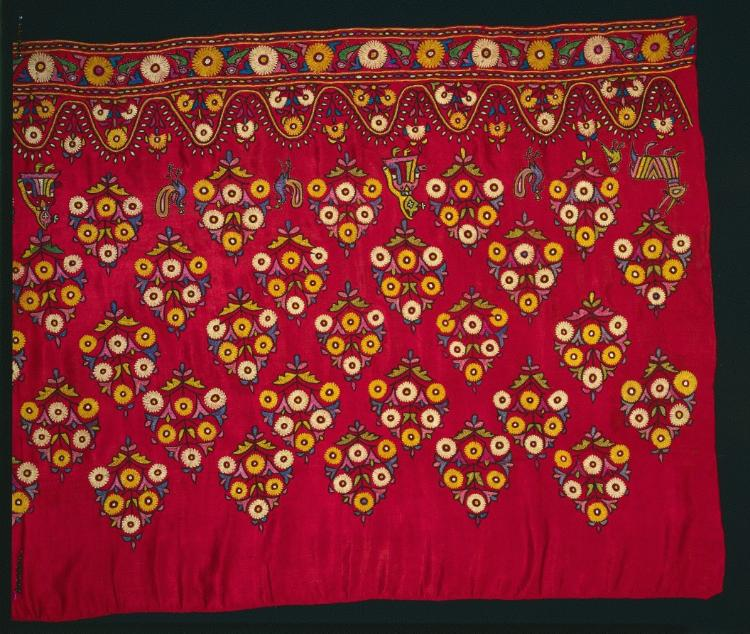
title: Panel for a Skirt (Ghagra)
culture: Western India, Gujarat, Kachchh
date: late 1800s or early 1900s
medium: embroidered satin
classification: Embroidery